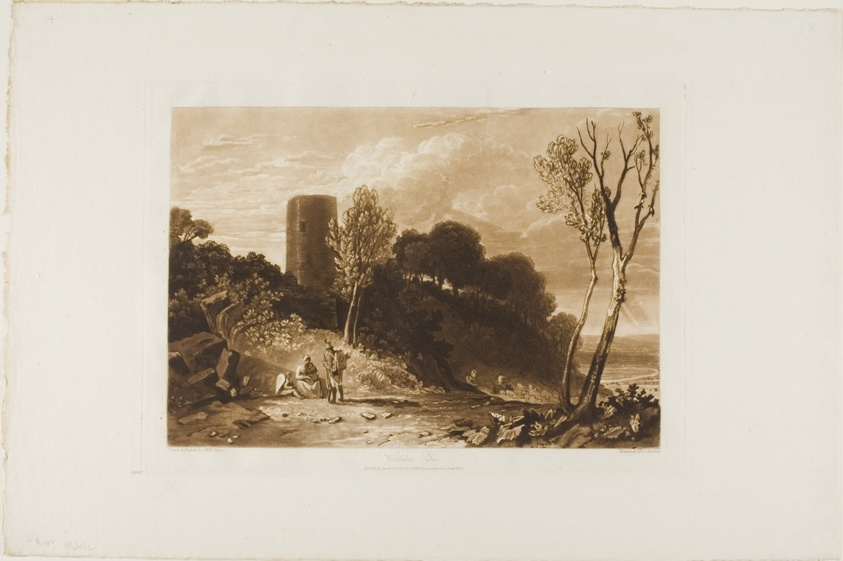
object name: Print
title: Winchelsea, Sussex, plate 42 from Liber Studiorum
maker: Joseph Mallord William Turner (English, 1775-1851); Engraved by I. C. Easling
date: published April 23, 1812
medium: Etching and engraving in brown on ivory wove paper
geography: England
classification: etching; print; prints and drawing